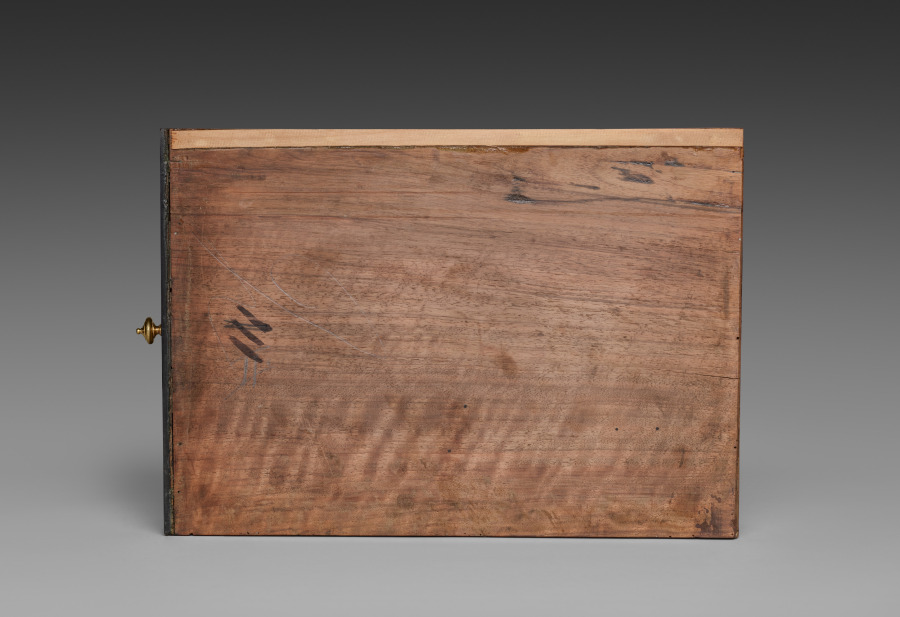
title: Interior Drawer for Cabinet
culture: France, late 17th Century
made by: André-Charles Boulle (French, 1642–1732)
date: c. 1690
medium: ebony, marquetry in metal and tortoiseshell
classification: Furniture and woodwork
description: Appointed cabinetmaker to King Louis XIV in 1672, André-Charles Boulle became a master of furniture making in France during the late 1600s until his death in 1732. Known primarily for his use of marquetry, in which metal patterns are inlaid into tortoiseshell then applied within the veneered surface of the furniture, Boulle established a level of quality and craftsmanship few others could achieve. As a result, his work found favor at the royal court and among other aristocrats and diplomats eager to impress the king. The inclusion of a medallion depicting Louis XIV within the bronze decoration of this chest would have identified the owner with the royal court. Often exhibiting stout architectural proportions with elegant groups of inlaid motifs such as the parrot on the central panel of this chest, Boulle’s designs are an example of the intellectual fashion for contrasting ideas, materials, and motifs.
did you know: Originally designed to sit atop an elaborate tall stand, this chest was likely altered in the late 1700s to reduce its scale and height.